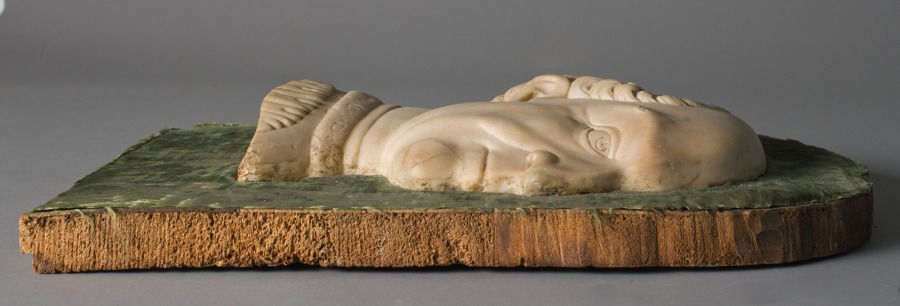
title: Portrait of Francesco Sforza and Frame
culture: Italy, Lombardy, 15th century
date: 1450–1499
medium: marble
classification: Sculpture